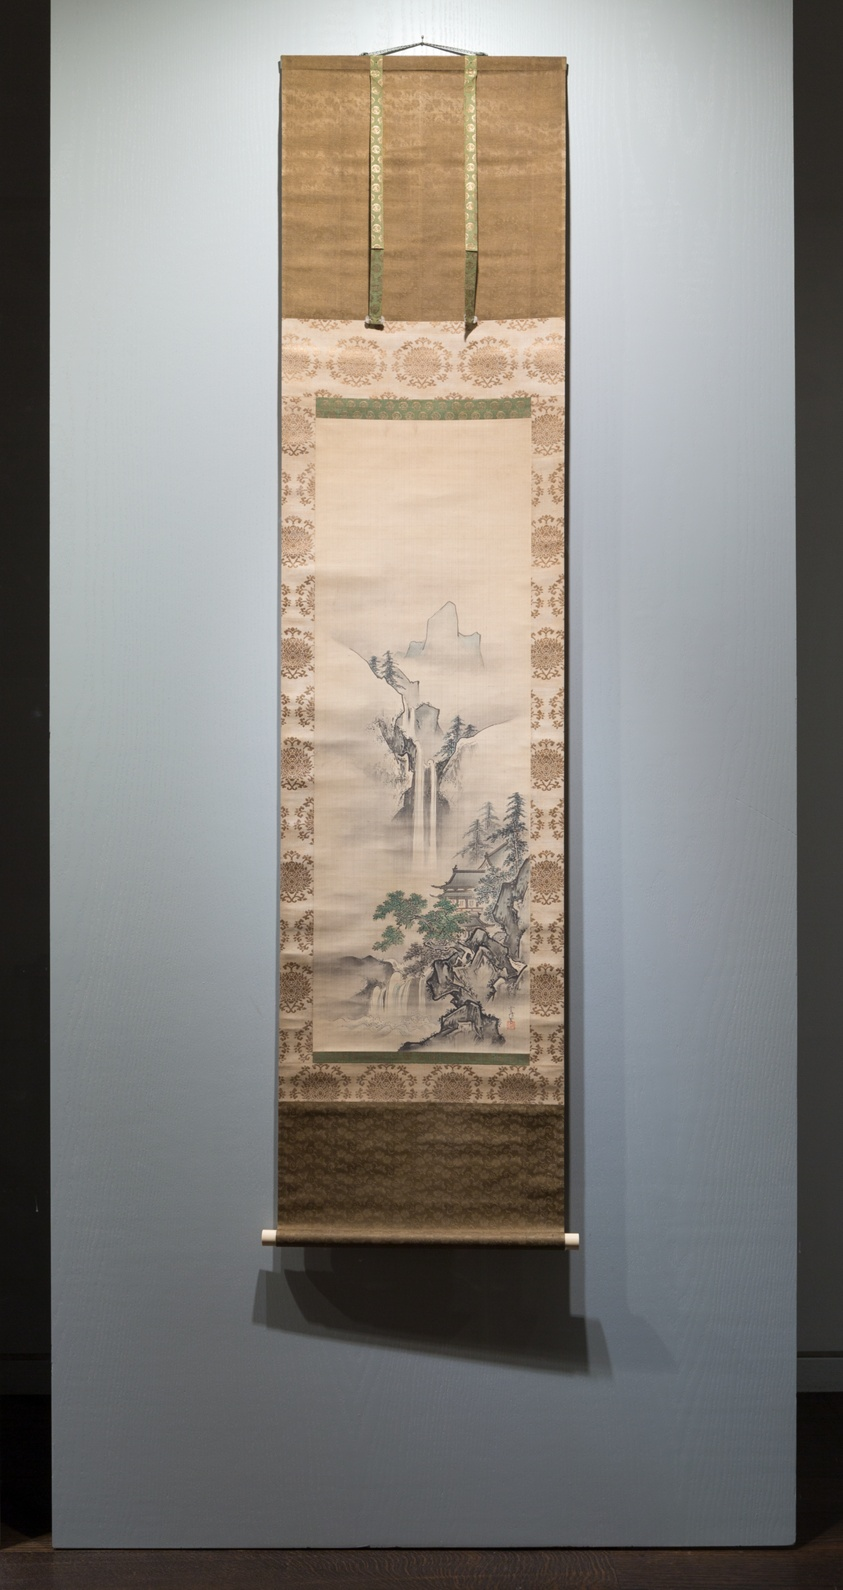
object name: Painting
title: Landsape with Waterfall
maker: Kano Tsunenobu; Japanese, 1636-1713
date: Late 17th–early 18th century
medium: Triptych of hanging scrolls; ink and light colors on silk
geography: Japan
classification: hanging scroll; painting; asian art